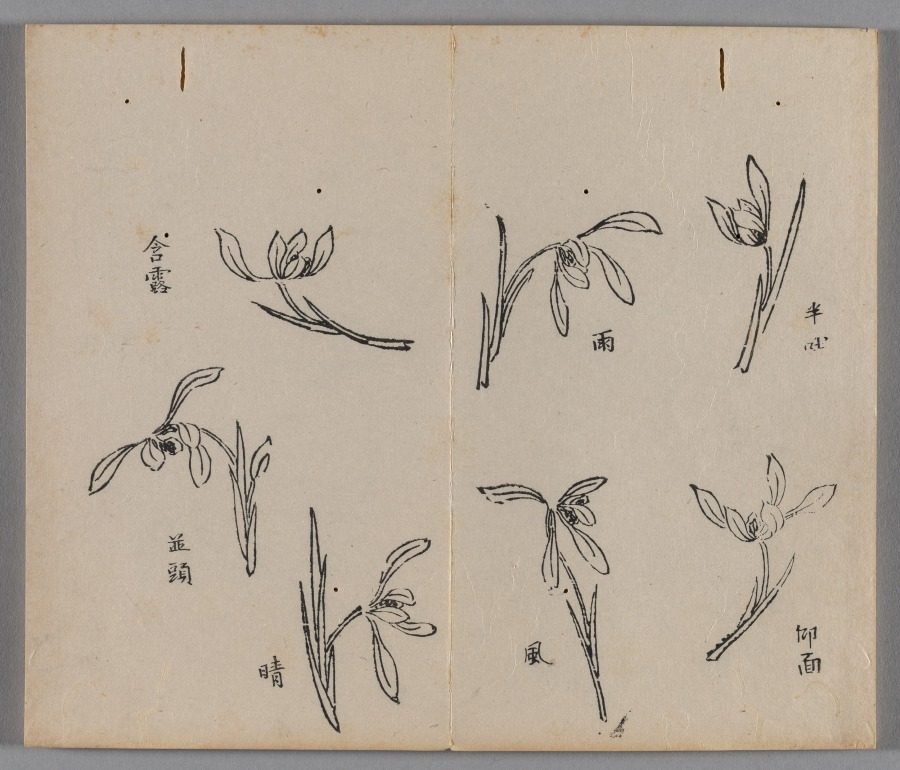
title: Ten Bamboo Studio Painting and Calligraphy Handbook (Shizhuzhai shuhua pu): Orchids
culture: China, Qing dynasty (1644-1911)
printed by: Hu Zhengyan (Chinese, c. 1584–1674)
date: 1633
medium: Woodblock-printed book; ink and colors on paper; first edition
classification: Print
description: Color printing reached a level of perfection in the early 1600s, as seen in this Ten Bamboo Studio Collection of Calligraphy and Painting and the Mustard Seed Garden Manual of Painting (printed 1679 and 1701). The painterly quality, precision in registering (aligning) the woodblocks, and harmonious colors made them the most successful color print editions in Chinese history. Both editions were printed and compiled in Nanjing, spread nationwide, and had a great impact on the arts in Japan and Korea.